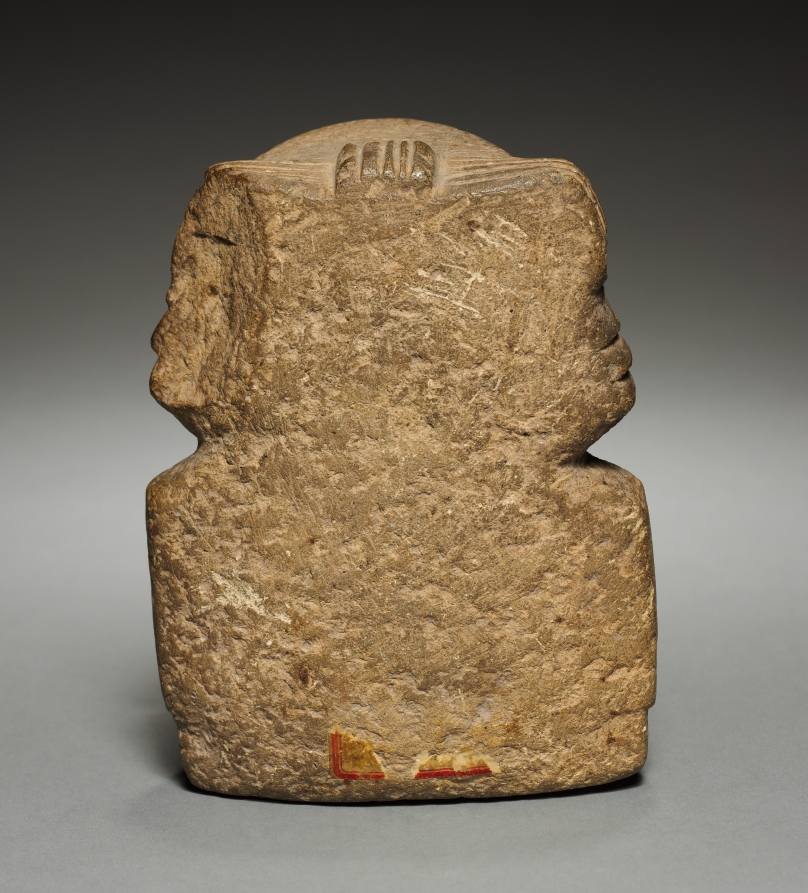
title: Seated Figure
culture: Pre-Columbian style, 20th century (?)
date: 20th Century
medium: tan stone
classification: Sculpture